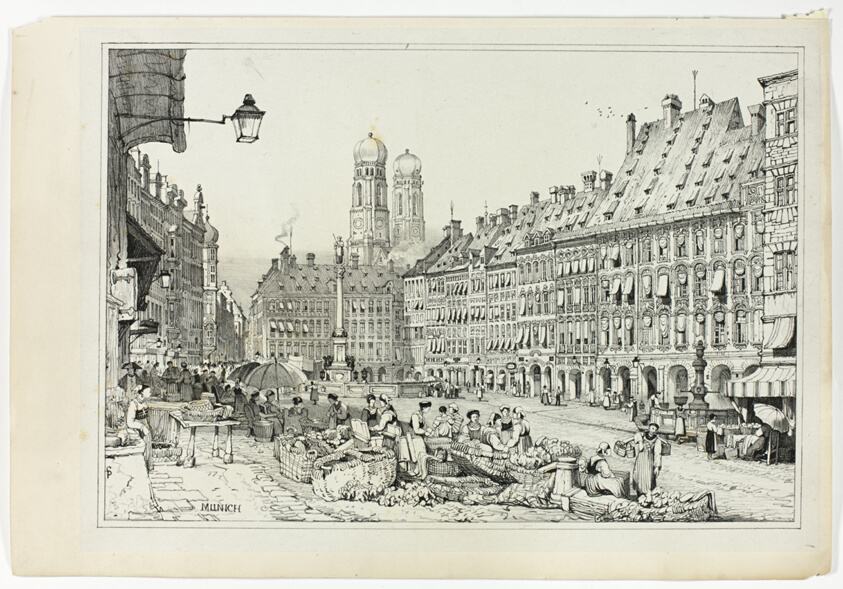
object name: Print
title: Munich, from Facsimiles of Sketches made in Flanders and Germany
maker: Samuel Prout (English, 1783-1852); printed by Charles Joseph Hullmandel (English, 1789-1850)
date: 1833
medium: Lithograph in black on grayish-ivory chine, laid down on ivory wove paper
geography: England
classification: lithograph; print; prints and drawing